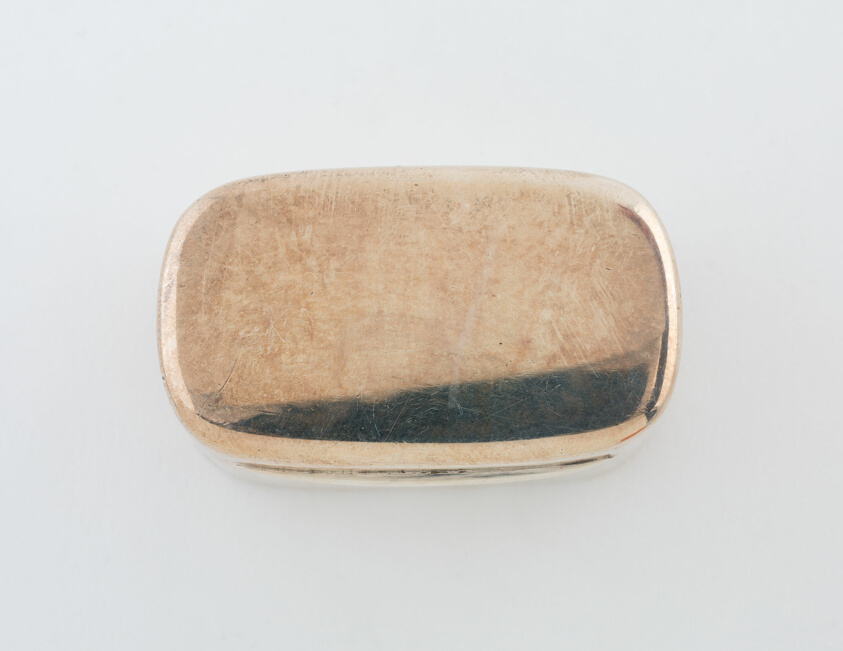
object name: Metalwork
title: Nutmeg Grater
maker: Marked GP; London, England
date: c. 1780/81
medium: Silver and iron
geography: London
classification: container for personal use; box; european decorative arts; metalwork; silver; decorative object/ornament